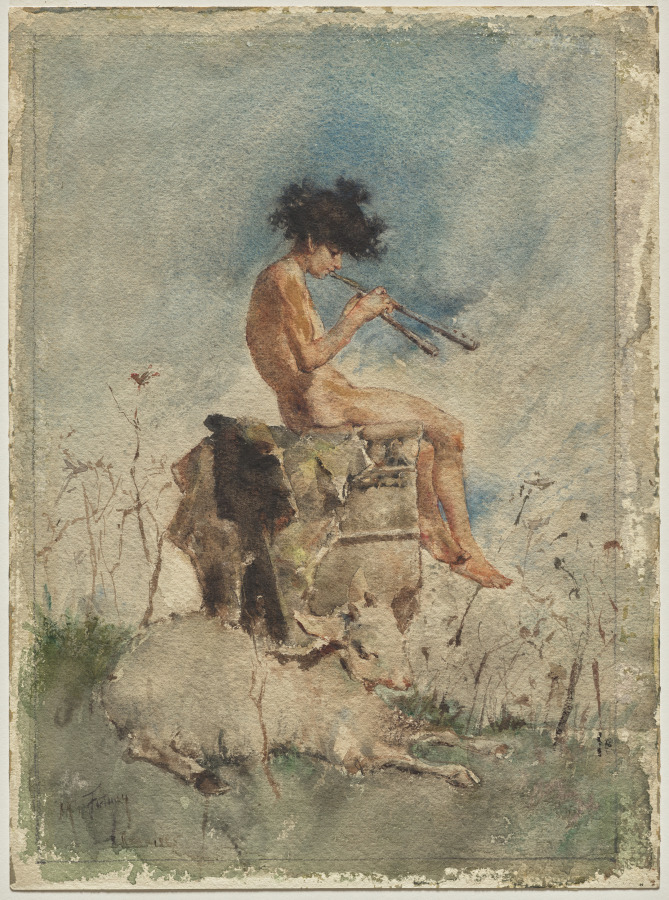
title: The Pipes of Pan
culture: Spain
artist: Mariano Fortuny (Spanish, 1838–1874)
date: 1865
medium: Watercolor with traces of pen and black ink; border in graphite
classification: Drawing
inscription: lower left, in brown ink: M Fortuny / Roma 1865